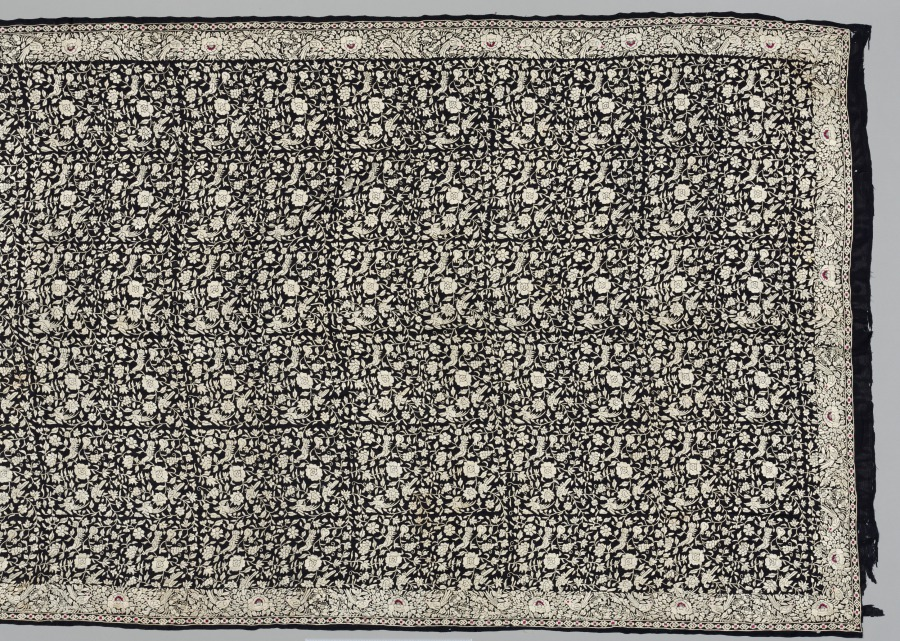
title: Shawl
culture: China, 19th century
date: 1800s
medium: embroidery, silk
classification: Embroidery